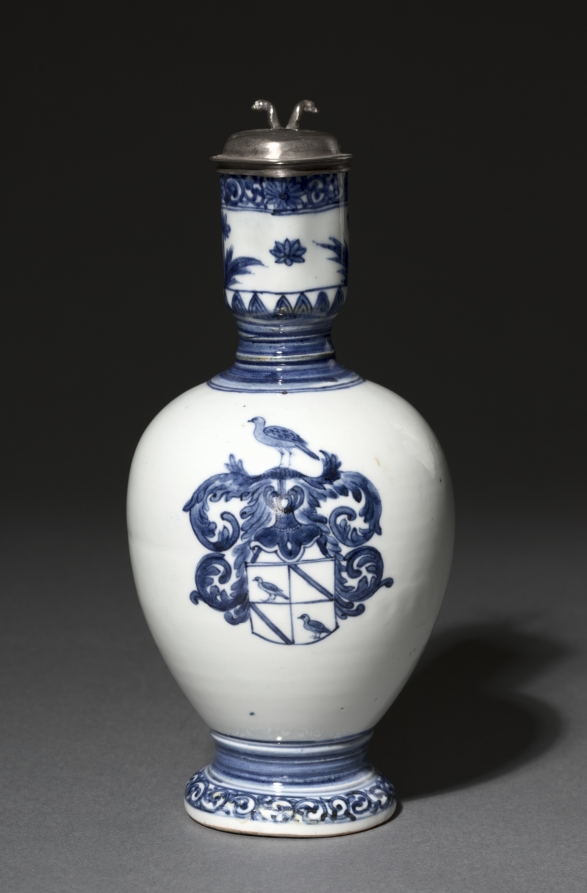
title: Jug with Silver Mounts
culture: Japan, Edo period (1615–1868)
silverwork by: Barent van Leeuwen (Dutch, 1637–1682)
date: c. 1662–76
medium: porcelain with underglaze blue decoration and silver mounts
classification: Ceramic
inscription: [on silver]: town mark for Amsterdam; lion rampant crowned (alloy mark for 0-934 silver); d (date letter for 1666), maker's mark of Barent van Leeuwen.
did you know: The coat of arms on this jug are those of the Valckenier family, active in the Dutch East India Company.